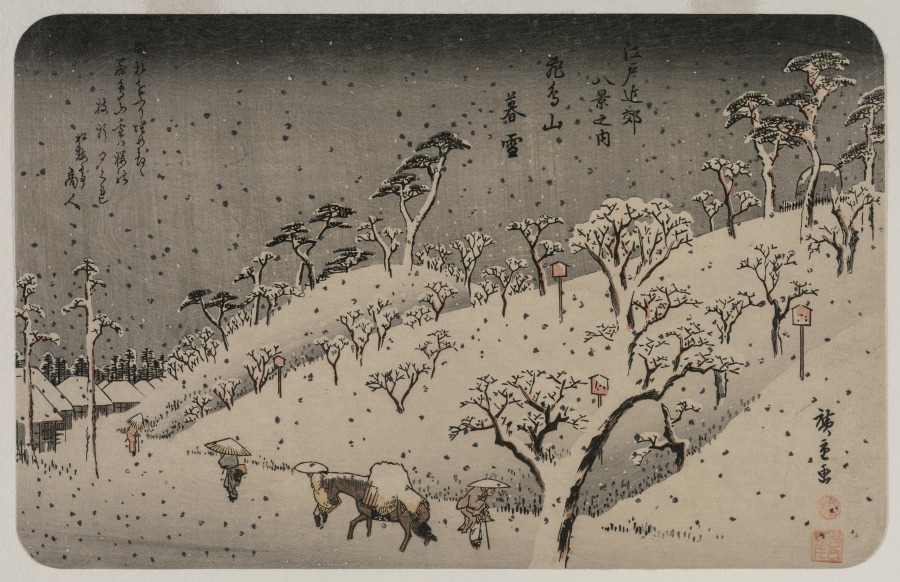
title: Evening Snow at Asuka Hill, from the series Eight Views of the Environs of Edo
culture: Japan, Edo period (1615–1868)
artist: Utagawa Hiroshige (Japanese, 1797–1858)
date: c. 1837–38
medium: color woodblock print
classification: Print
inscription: Signature: Hiroshige ga. Publisher: Sanoya Kihei (Kikaku). Censorship Seal: kiwame.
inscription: The snow falling heavily in the dusk not only covers up signs/ that warn against breaking branches of the cherry trees on Asuka Hill,/ but breaks down the branches, as well. - Shōyōan Kōjin (or Takahito)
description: This print series was first privately produced for the Taihaidō poetry club led by a “wild” or comic verse (kyōka) poet with the humorous pen name Taihaidō Donshō (or Nomimasu), which translates to “Hall of the Large Cup, Swallow a Liter (or Drink).” The initial print had three poems by members of the club at the top. This print, released as part of a public set of the series later on, has but a single poem, not featured in the original, which reads: The snow falling heavily in the dusk not only covers up signs that warn against breaking branches of the cherry trees on Asuka Hill, but breaks down the branches, as well. It is signed Shōyōan Kōjin (or Takahito), which means “Hermitage of Pine and Cherry, High Person.”